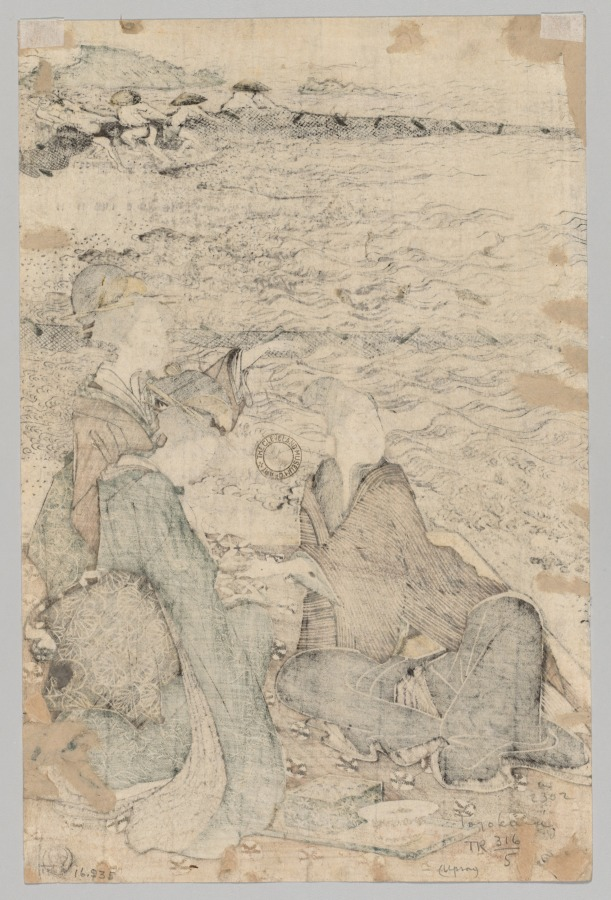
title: Man and Two Women at the Sea Shore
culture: Japan, Edo period (1615–1868)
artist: Utagawa Toyokuni (Japanese, 1769–1825)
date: 1769–1825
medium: color woodblock print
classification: Print